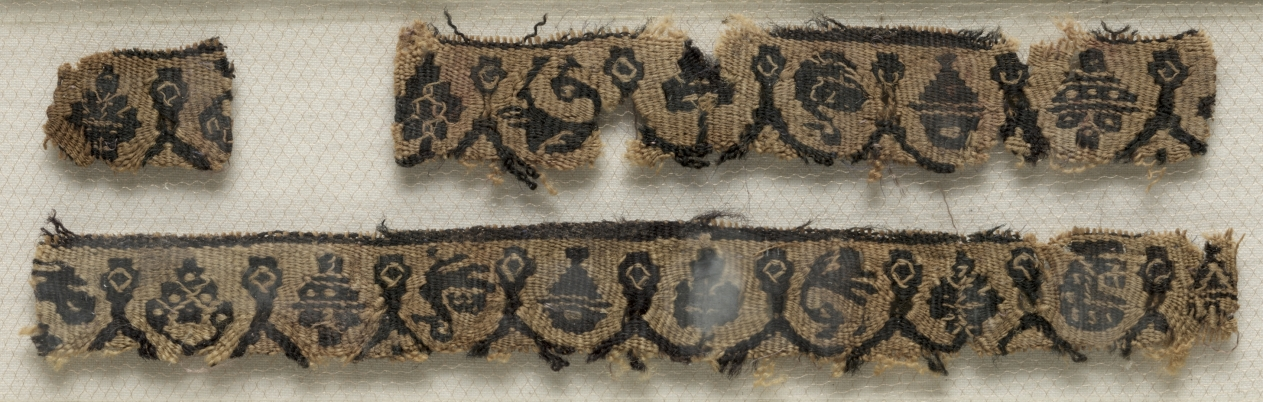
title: Fragments, Sleeve Ornament from a Tunic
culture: Egypt, Byzantine period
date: 500s - early 600s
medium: tapestry (probably originally inwoven in tabby ground); wool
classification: Textile